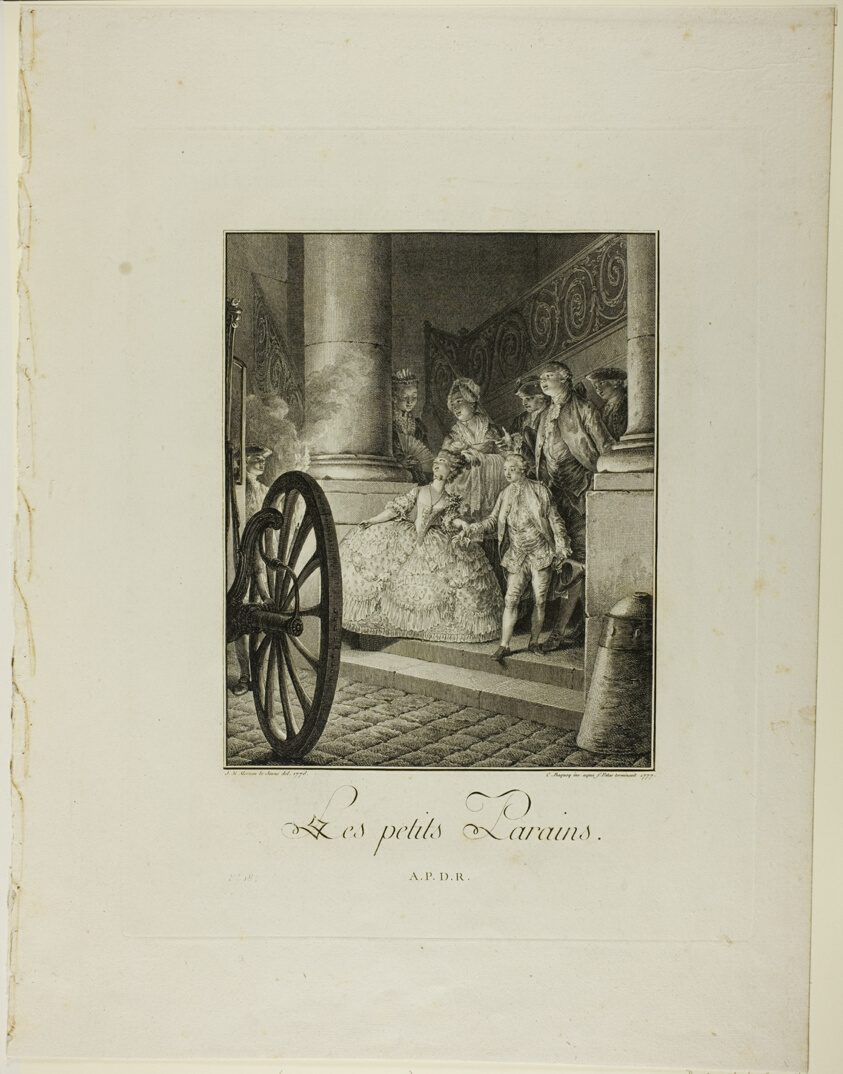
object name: Print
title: The Little Godfathers, from Monument du Costume Physique et Moral de la fin du Dix-huitième siècle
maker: Jean Charles Baquoy (French, 1721-1777) and Charles Emanuel Patas (French, 1744-1802); after Jean Michel Moreau (French, 1741-1814); published by Laurent-François Prault (French 1712-1780)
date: 1777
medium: Engraving on paper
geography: France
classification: etching; print; prints and drawing